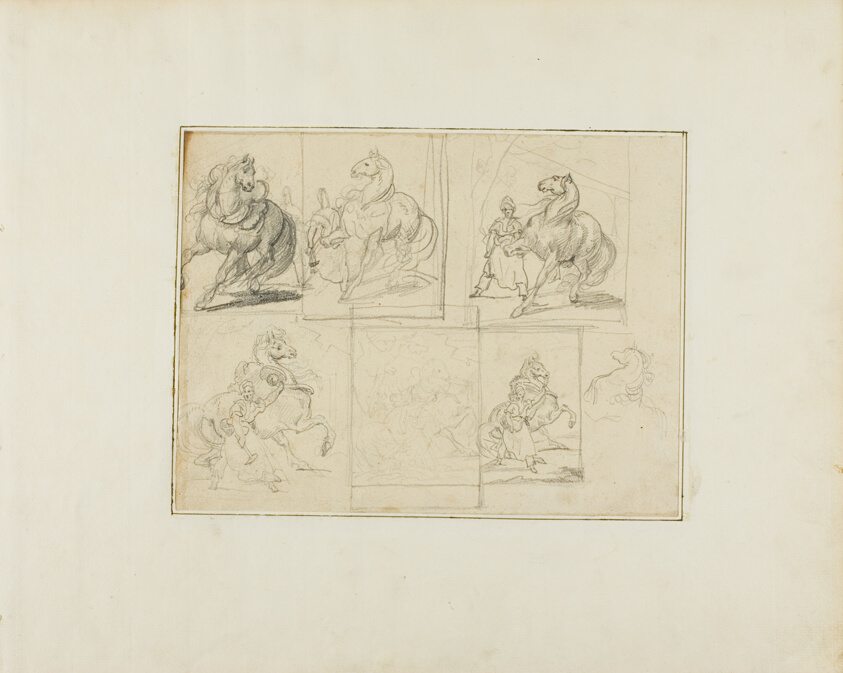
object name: Drawing and Watercolor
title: Studies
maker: Jean Louis André Théodore Géricault (French, 1791-1824)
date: 1813/14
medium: Graphite, on cream wove paper, perimeter mounted on ivory laid paper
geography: France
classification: graphite; drawings (visual works); prints and drawing